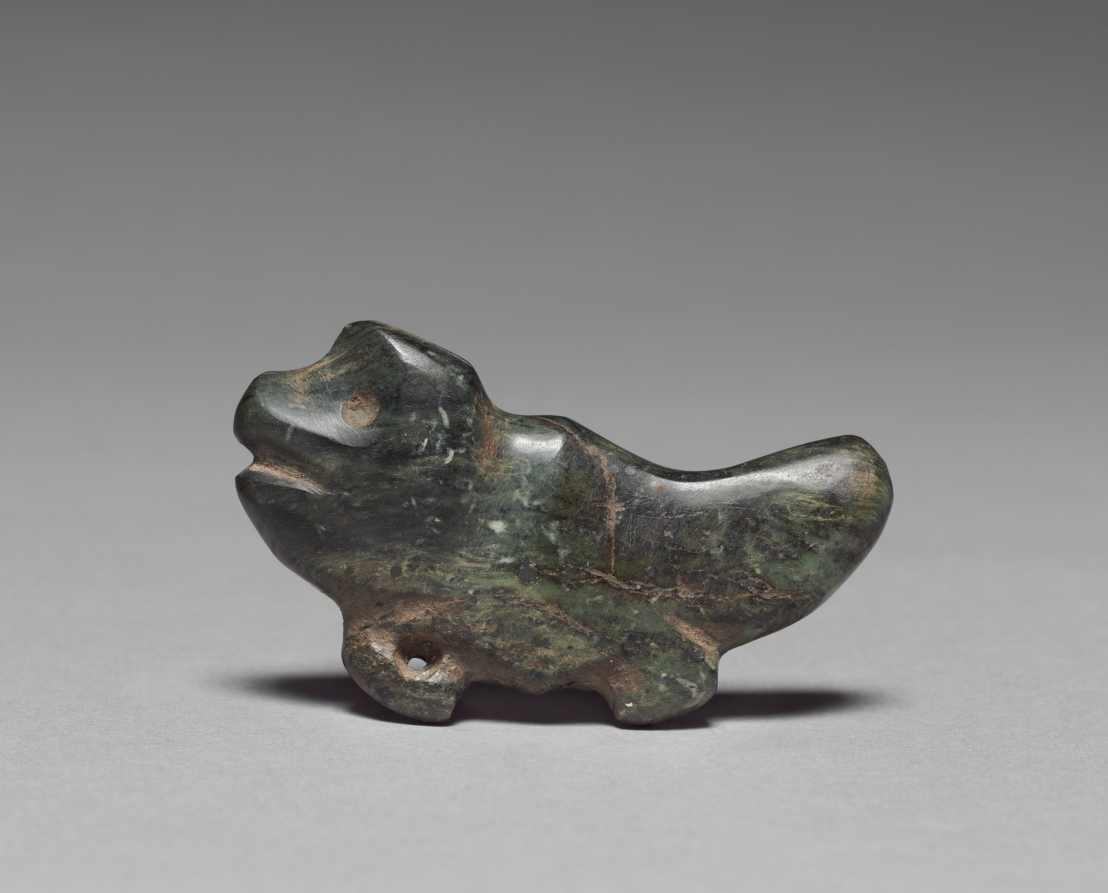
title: Fish Pendant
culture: Mesoamerica, Mexico, Guerrero, Mezcala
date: 100 BCE–300 CE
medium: serpentine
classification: Sculpture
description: The Mezcala style takes its name from a river in its homeland, the Guerrero region of western Mexico. The style is known for small-scale sculptures characterized by sleek abstraction and often made of greenstone, one of the most precious materials that Mesoamerican artists worked. Unfortunately, little is known of the sculpture's meanings and archaeological contexts.